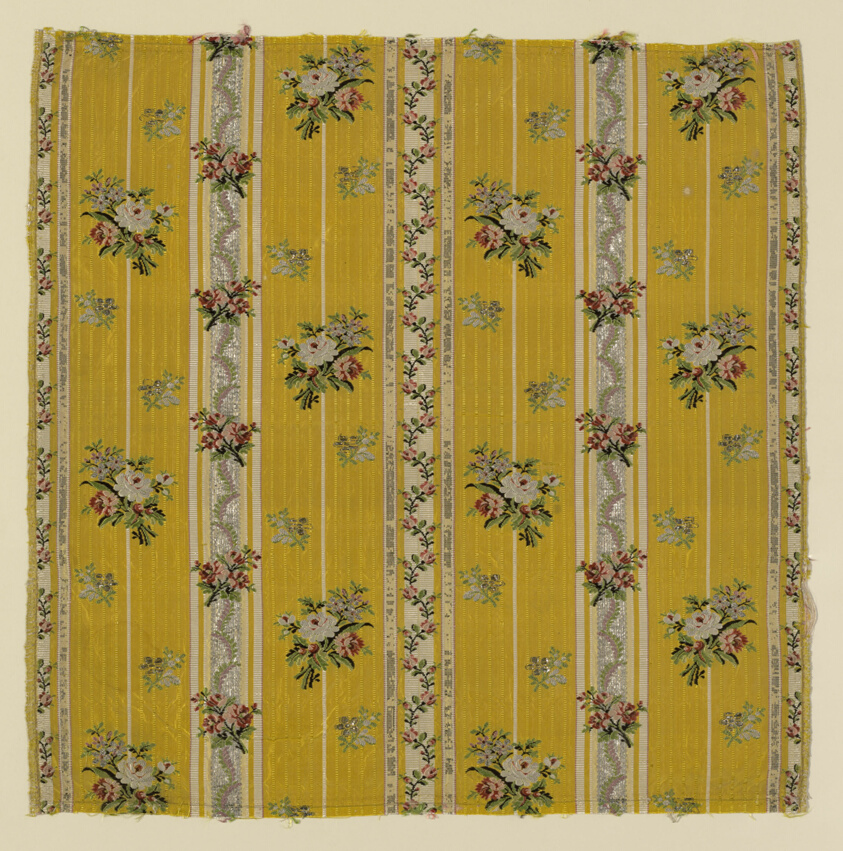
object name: Textile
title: Fragment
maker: France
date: 1770/80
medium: Silk, silvered-metal strips, and silvered-metal-strip-wrapped silk (frisé), plain weave with supplementary patterning warps and supplementary brocading wefts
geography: France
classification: textile; weaving